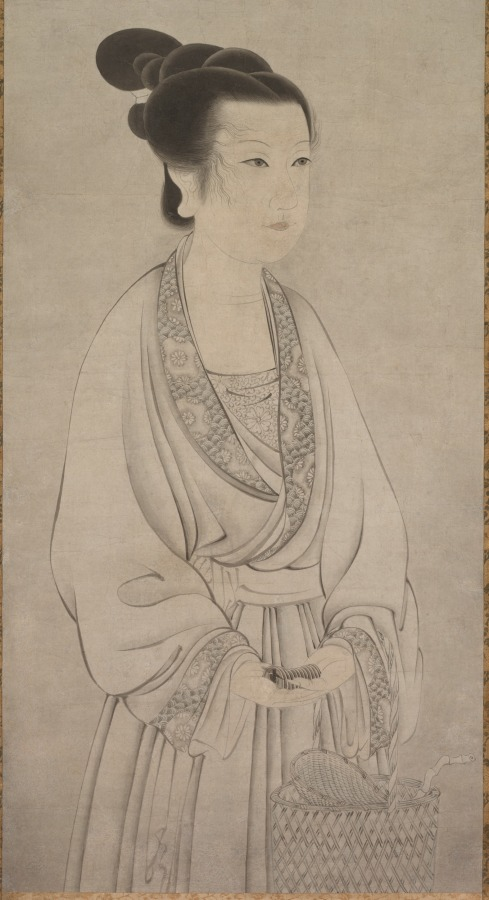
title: Rei Shōjo (Ling Zhaonu)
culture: Japan, Muromachi period (1392–1573)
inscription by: Shunoku Sōen (Japanese, 1529–1611)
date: 1500s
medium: hanging scroll, ink and light color on paper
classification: Painting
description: Legend has it that Chinese beauty Ling Zhaonu, whose name is pronounced Rei Shōjo in Japanese, was a model of devotion to her parents. She put great effort into selling baskets made by her elderly father, a devout Buddhist, thereby keeping the family afloat financially. The verse on the painting relates her story, and was inscribed by a Zen monk.